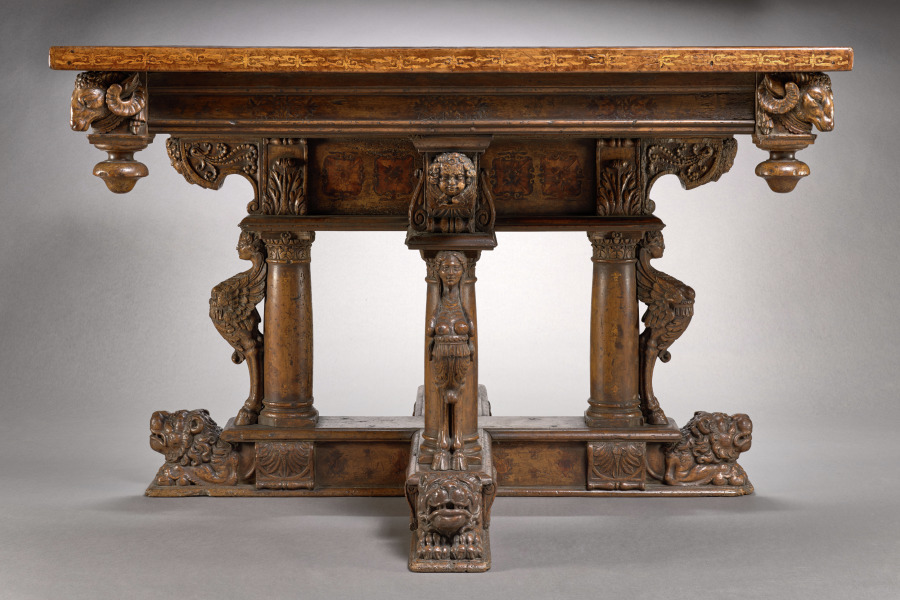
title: Inlaid Table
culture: France, Burgundian School, 16th century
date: 1550–1599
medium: walnut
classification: Furniture and woodwork